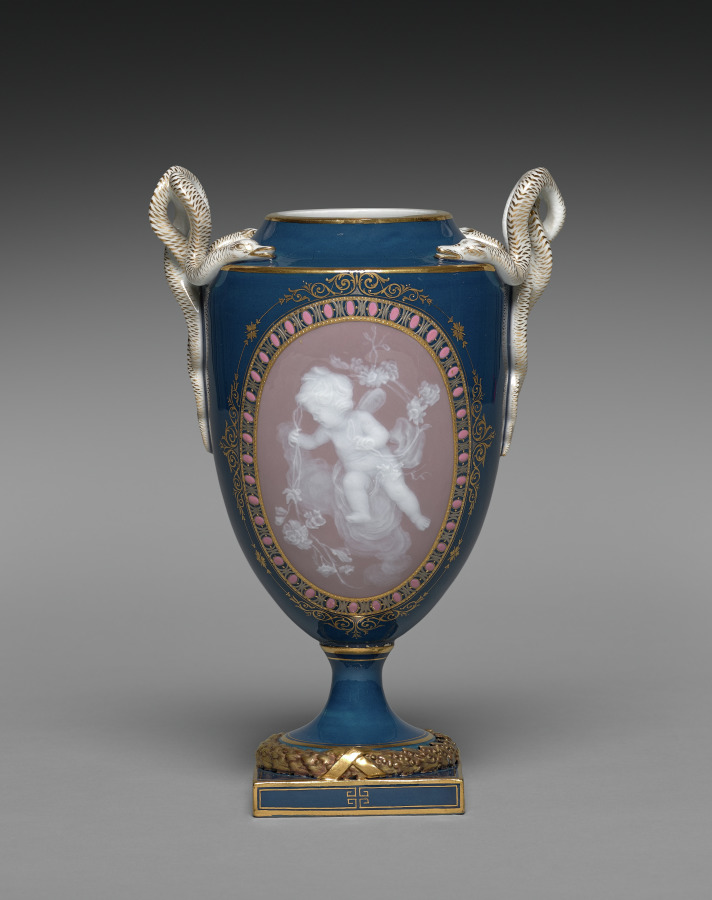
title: Vase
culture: Germany, 19th century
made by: Meissen Porcelain Factory (German, est. c. 1710)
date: 1881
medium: porcelain with pâte-sur-pâte decoration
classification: Ceramic